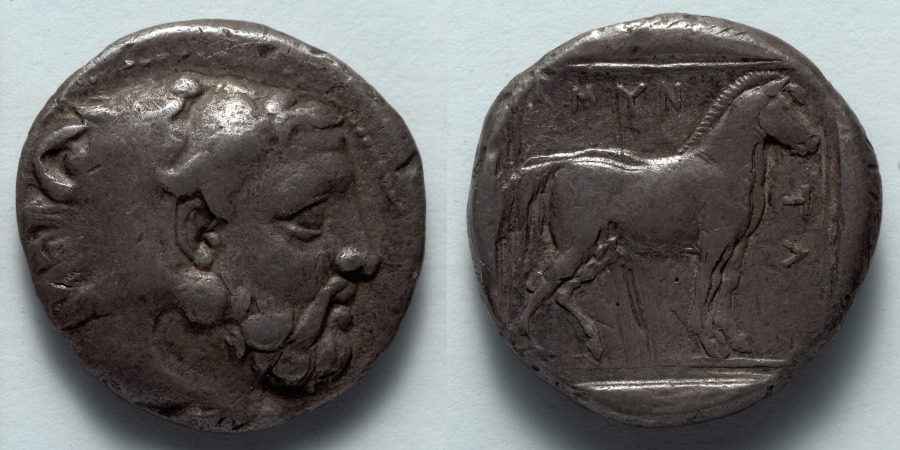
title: Stater: Head of Bearded Herakles (obverse); Horse (reverse)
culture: Greek, Macedonian, probably minted at Pella (Macedonia), reign of Amyntas III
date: 389–369 BCE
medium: silver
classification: Coins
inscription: ΑΜΥΝ | ΤΑ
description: An older, bearded Herakles wears his lion-skin on the obverse of this coin, surrounded by a beaded border. On the reverse, a horse stands within an incuse square, where the inscription ΑΜΥΝ ΤΑ identifies King Amyntas III as ruler. The pairing of head and horse extends back to the earlier Macedonian king Archelaus (413-399 BC), though a young male head sometimes takes the place of Herakles.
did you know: Amyntas III was the father of Philip II and grandfather of Alexander III (the Great).